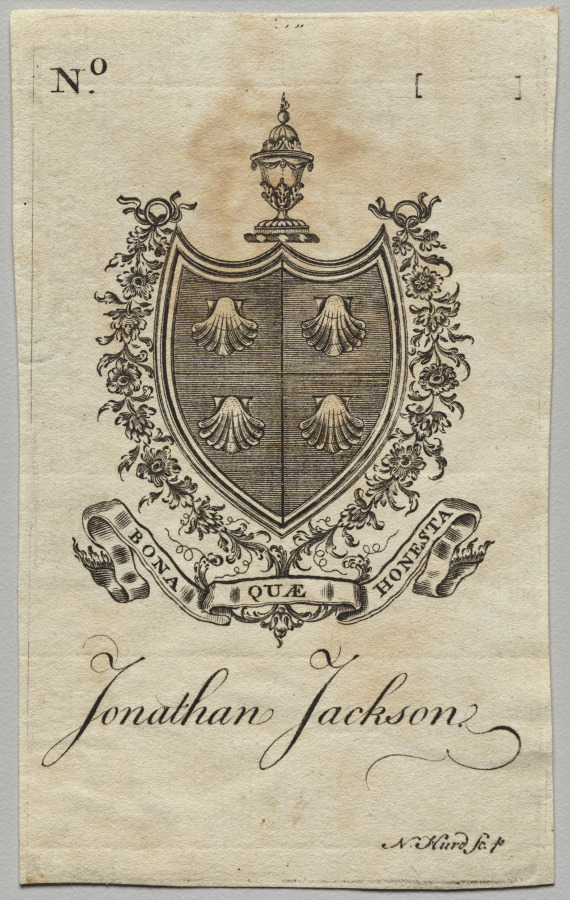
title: Bookplate: Coat of Arms with Jonathan Jackson inscribed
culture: America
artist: Nathaniel Hurd (American, 1730–1778)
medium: engraving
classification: Print